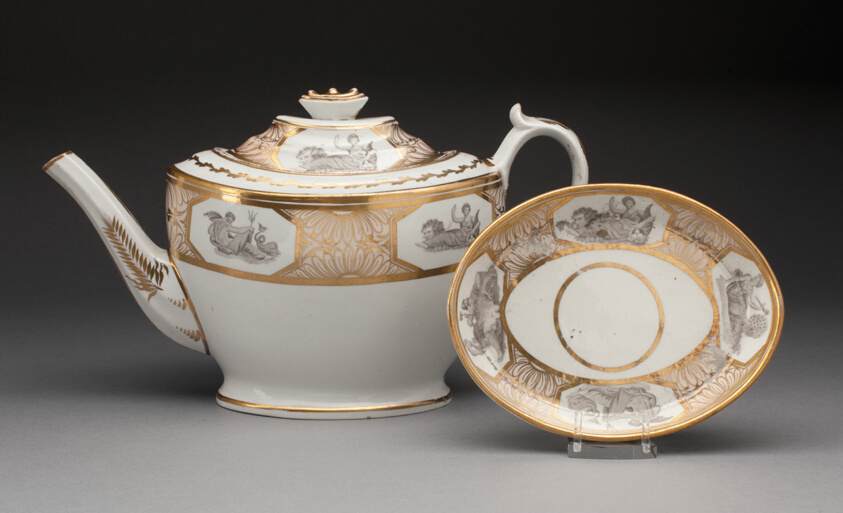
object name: Ceramics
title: Teapot with Stand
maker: Worcester Porcelain Factory (Flight & Barr Period, 1792–1804); Worcester, England, founded 1751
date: c. 1800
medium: Soft-paste porcelain with monochrome gray and gilding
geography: Worcester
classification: teapot; teaware; porcelain; european decorative arts; ceramics